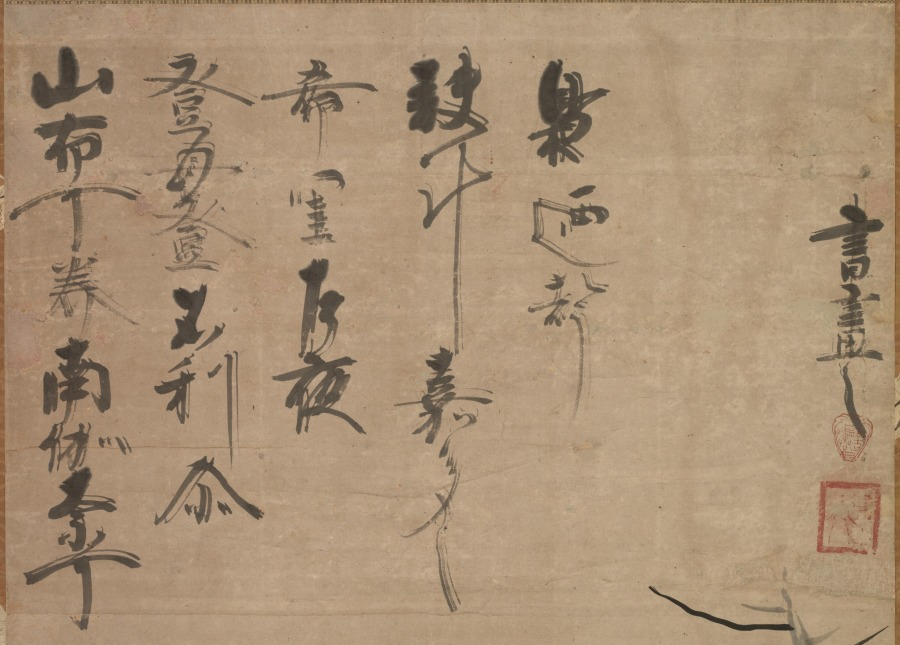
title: Owl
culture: Japan, Edo period (1615–1868)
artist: Tsuda Bensaku (Japanese, active 1620s–40s)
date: 1630s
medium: hanging scroll; ink and slight color on paper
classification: Painting